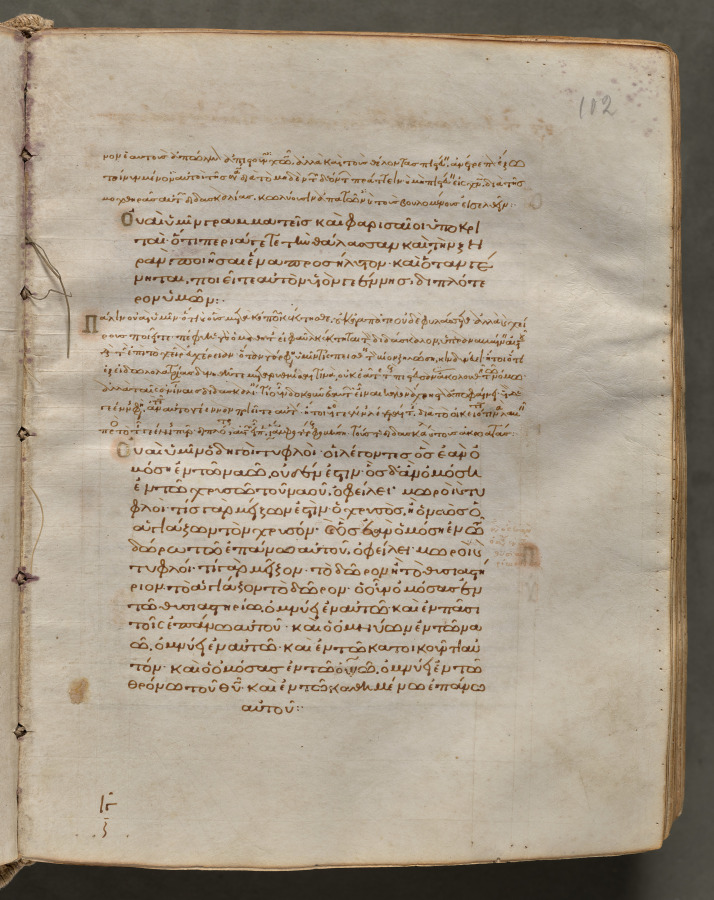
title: Text, folio 102 (recto), from a Gospel Book with Commentaries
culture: Byzantium, Constantinople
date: c. 1000–1100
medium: ink, tempera, and gold on vellum; leather binding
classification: Bound Volume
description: Each of the four gospels in this book opens on a page with brilliantly illuminated borders depicting the author of the text as well as birds-principally peacocks, symbols of the immortality of the soul-and fountains, representing the fountain of life and the salvation of the soul. This volume consists of 428 leaves with texts in Greek. Its level of sophistication suggests that it was probably written and decorated in a monastery in Constantinople.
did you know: Gospel Books were carried in procession through Byzantine churches.